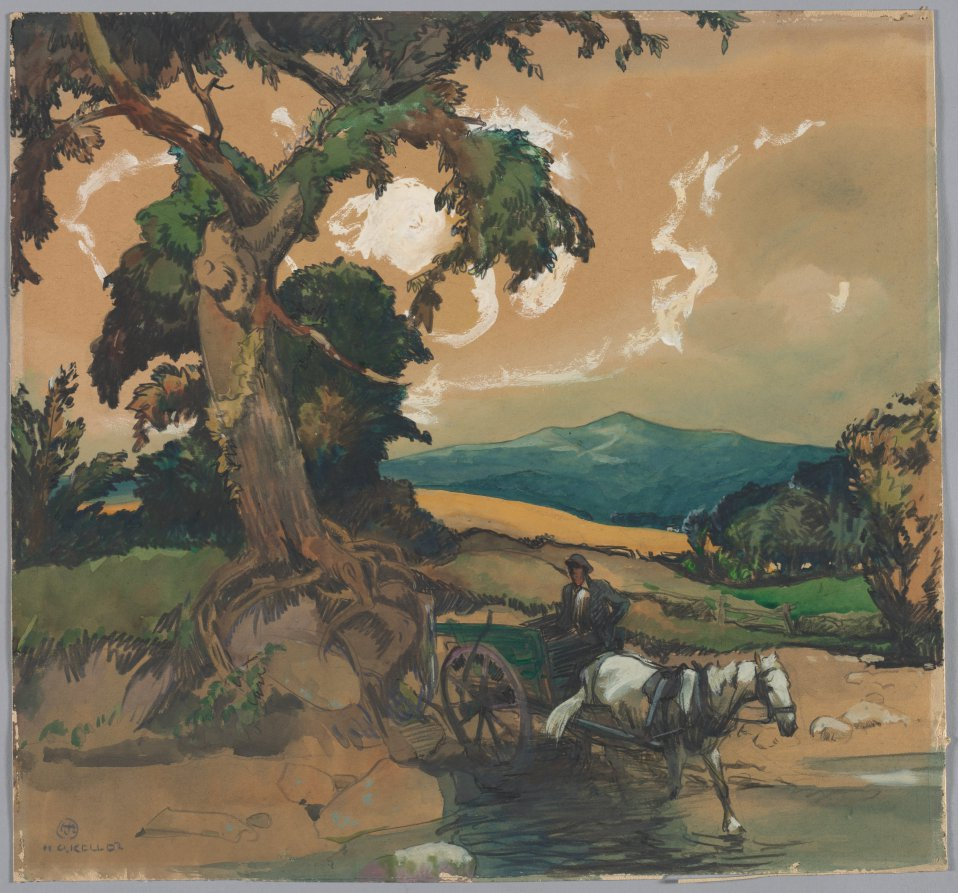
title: The Ford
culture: America, Ohio, Cleveland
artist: Henry Keller (American, born Germany, 1869–1949)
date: 1919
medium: watercolor and crayon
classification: Drawing